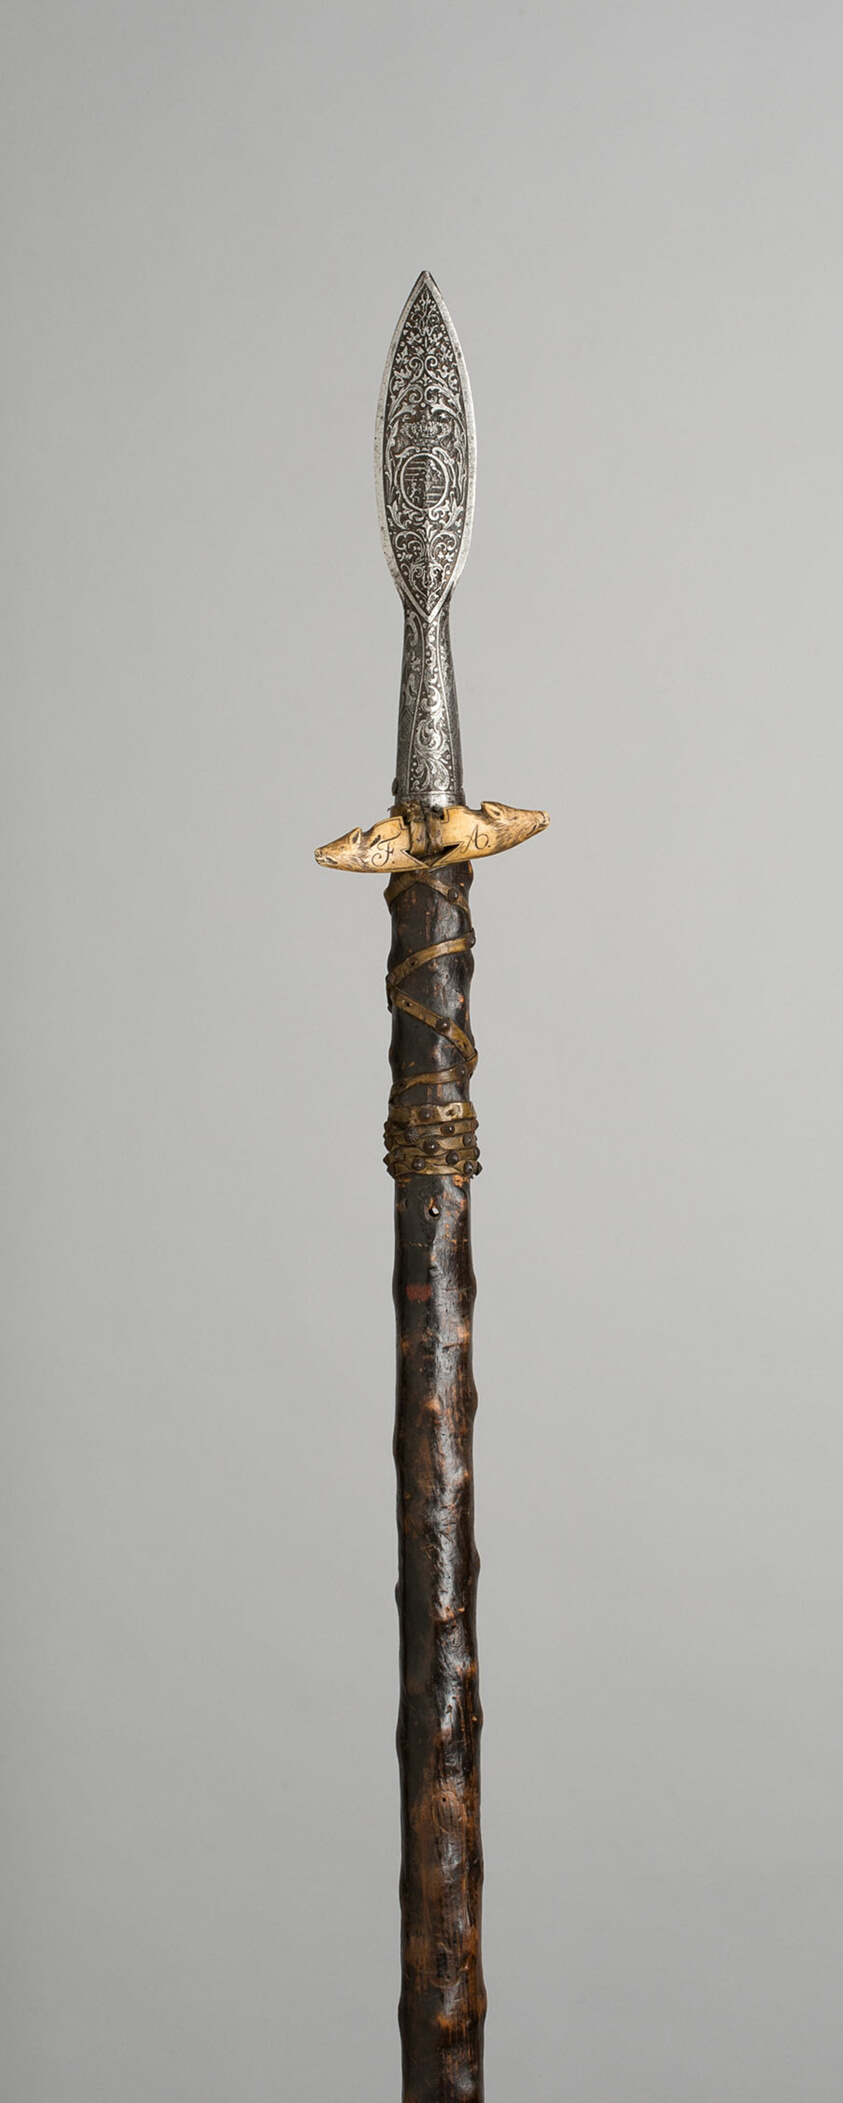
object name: Arms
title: Boar Spear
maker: Austrian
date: 1680/1700 with later decoration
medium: Steel, brass, staghorn, leather, wood, and silk velvet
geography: Austria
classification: edged weapon-staff; arms; arms and armor